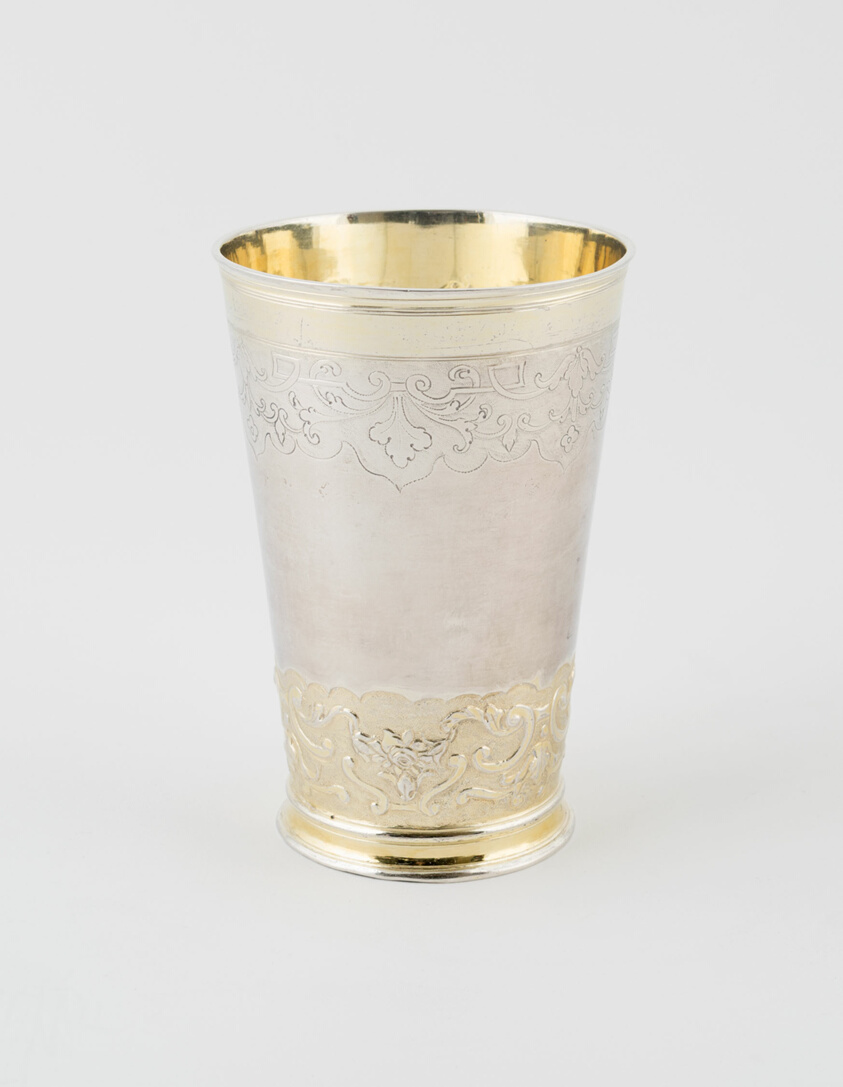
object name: Metalwork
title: Beaker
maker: Augsburg, Germany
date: 1712/13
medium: Parcel gilt silver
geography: Augsburg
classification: drinking vessel; silver; metalwork; european decorative arts